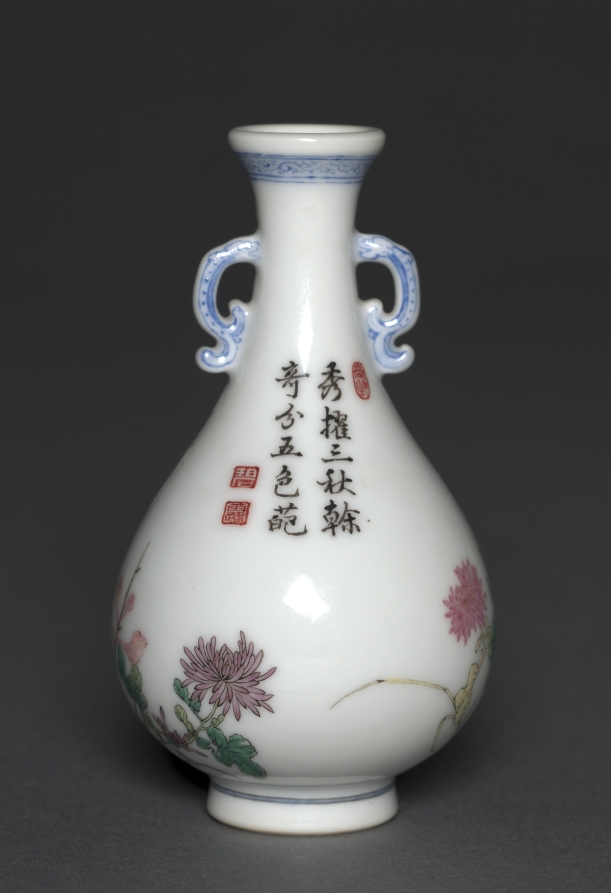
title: Miniature Vase with Birds and Chrysanthemums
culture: China, Jiangxi province, Jingdezhen kilns, Qing dynasty (1644-1911), Qianlong mark and reign (1736-95)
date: 1736–95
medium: porcelain with famille rose overglaze enamel decoration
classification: Ceramic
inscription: 乾隆年製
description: In the Qing dynasty (1644–1911), imperial patronage and a growing urban population encouraged consumption of luxury goods and local craftmanship. Luxury items became more affordable to larger parts of the society, including women, merchants, and literati in non-official positions. This miniature porcelain vase with famille rose overglaze enamel decoration illustrates some of the highest technical accomplishments in Qing porcelain production.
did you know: Famille rose overglaze enamel decoration is accompanied by underglaze blue on the vase's collar and handles.